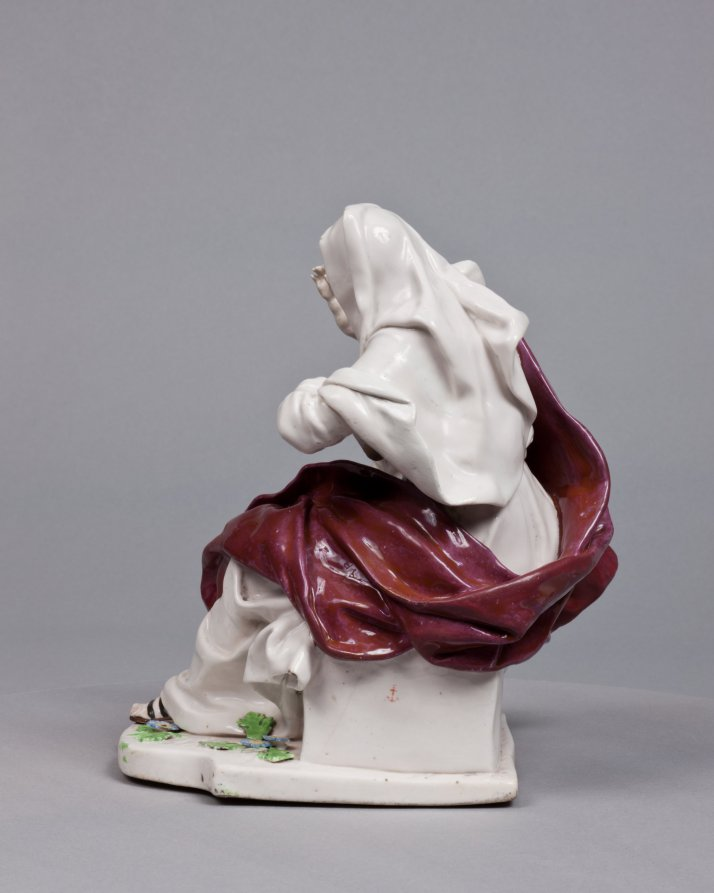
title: Madonna and Child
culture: England, Chelsea, 18th century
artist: Chelsea Porcelain Factory (Britain, London, 1745–84)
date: c. 1755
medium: porcelain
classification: Ceramic